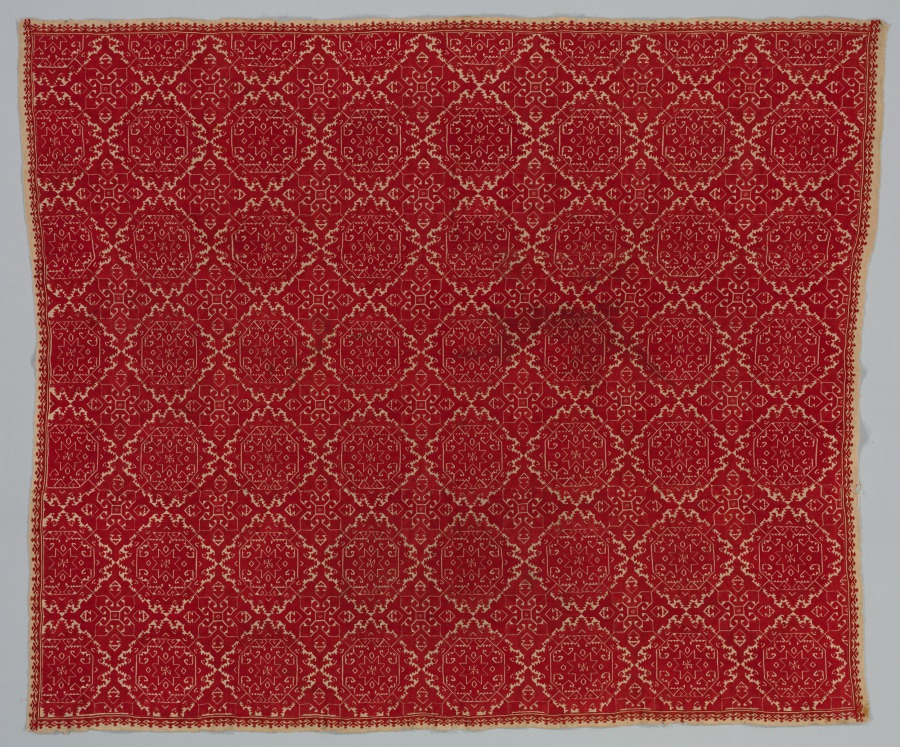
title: Bedspread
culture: Greece, Cyclades Islands, Naxos, 18th century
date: 1700s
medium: embroidery: silk on linen tabby ground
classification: Embroidery